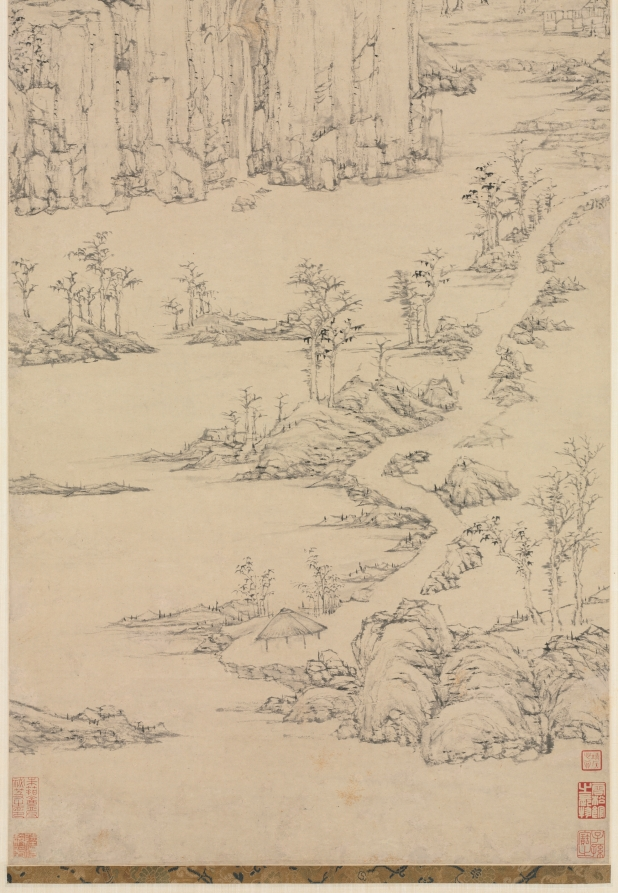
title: Daoist Retreat in Mountain and Stream (Landscape after Ni Zan [1301–1374])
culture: China, Ming dynasty (1368–1644)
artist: Lu Zhi (Chinese, 1496–1576)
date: 1567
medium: hanging scroll; ink on paper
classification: Painting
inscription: Artist's inscription, signature, and 3 seals: In my youthful days I liked to imitate the ink method of Yün-lin [Ni Tsan]. Mr. Wen, the academician [Wen Cheng-ming], remarked that I barely succeeded in achieving some resemblance. He once honored me with the inscription "lofty and imperturbable indeed was the personality of Ni Yü [Ni, the Odd]. Pale ink and blue smoke were formed by his scribbling brush. His surviving works have become so rare in the last two hundred years; only Pao-shan [Lu Chih] carries on his true tradition." In my older years, having to comply with frequent requests for paintings, my brushwork has become stronger than before and I thought to myself that I may have surpassed the Old Master. In the ting-mou year of the Lung-ch'ing era [1567] a friend brought a small painting [by Ni Tsan] and showed it to me in the mountains. I studied and enjoyed it for a long time, then realized that I was actually inferior. This gave me second thoughts about my earlier style, so I selected a piece of old window paper and did this painting in imitation. My friend was kind enough to say that it was truly a quick and close resemblance. I then wrote a colophon and presented the painting to him. My poem says: High mountains and distant waters are the thoughts coming from the lute; The drunken leaves and the sparse woods are merely flowers in the mirror. This idea, I'm sure, will be understood by Tzu-ch'i, one who appreciates my art, It is for him that I have painted on thin paper with light touches, The cloudy color of an autumn evening. This is the winter solstice of the same year. By then, Pao-shan, Mr. Lu, was already over seventy years of age. Could it be that one's brush also gets old together with one's age, as the saying goes. I put down my brush with a laugh. [2 seals] Lu Shu-p'ing shih, Pao-shan tzu. [seal, bottom left corner] Lu Chih shu-p'ing. trans. WKH 6 additional seals of Chu Ching-hou (n.d.).